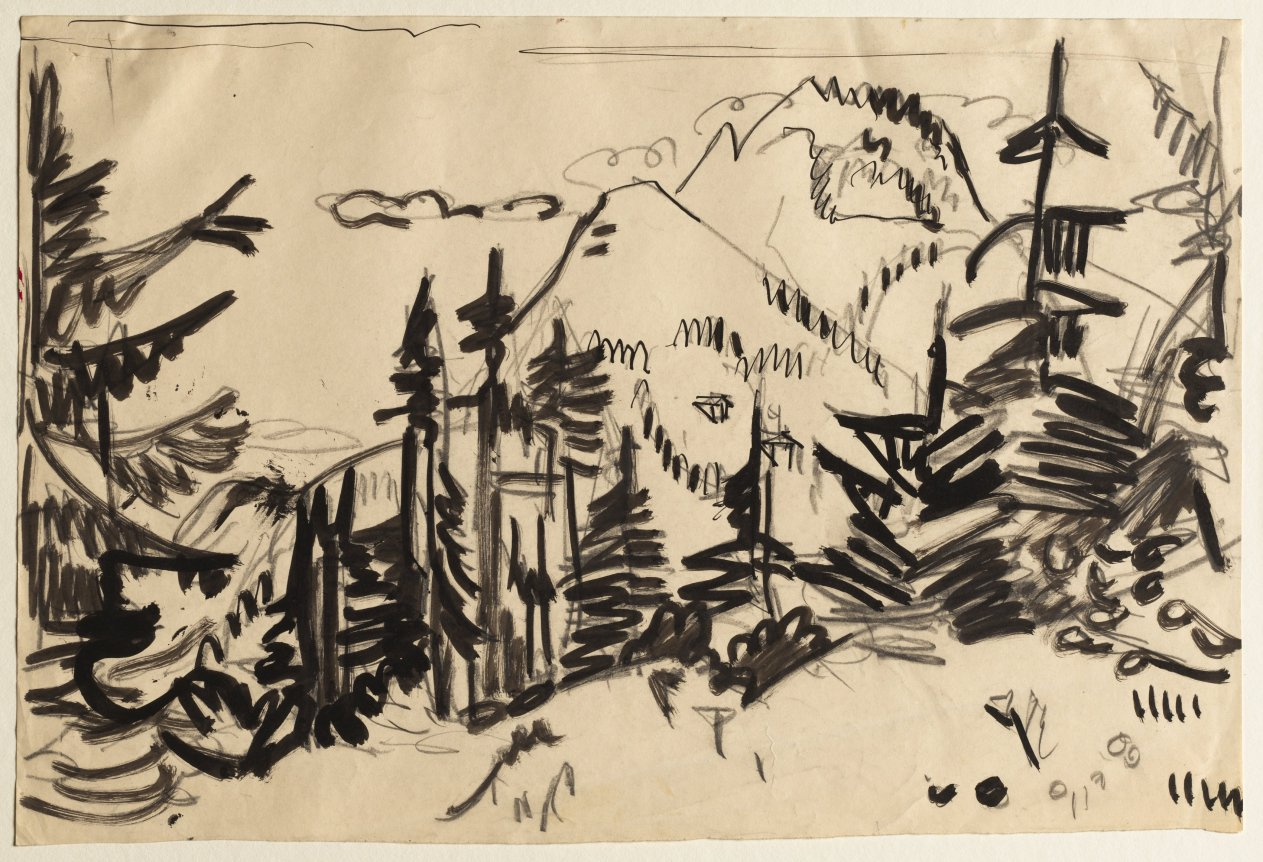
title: Mountain Landscape with Fir Trees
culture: Germany, 20th century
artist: Ernst Ludwig Kirchner (German, 1880–1938)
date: 1918/19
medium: graphite and brush and black ink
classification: Drawing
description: Following his discharge from the military after a mental and physical breakdown in 1915, Ernst Ludwig Kirchner took refuge at a sanitarium near Davos, Switzerland. The alpine landscape provided a new focus for his work and became a metaphor for his spiritual regeneration. Kirchner sketched this scene with black ink swept over graphite. His viewpoint is one of self-absorption, from within the mountain range rather than from above, a subjective view with vigorous marks that imbue the scene with energy.